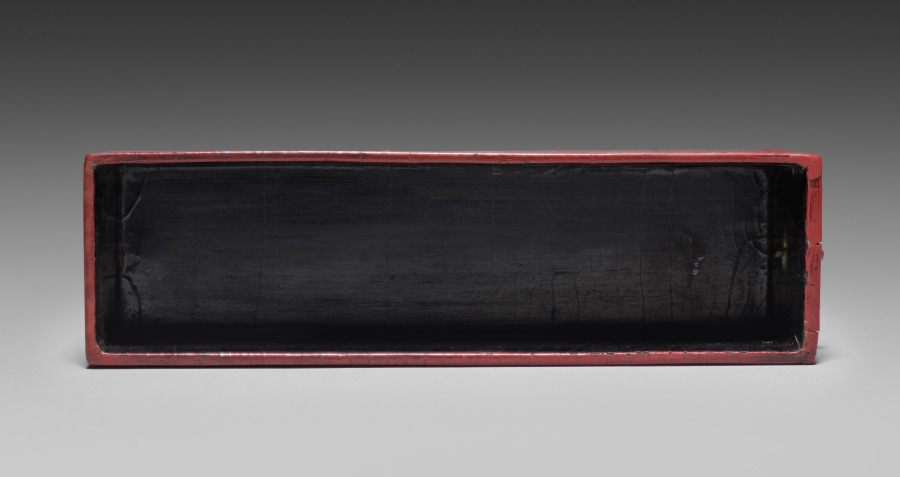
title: Drawer for a Tihong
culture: China, Ming dynasty (1368-1644), Wanli reign (1572-1620)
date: 1585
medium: carved cinnabar lacquer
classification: Lacquer